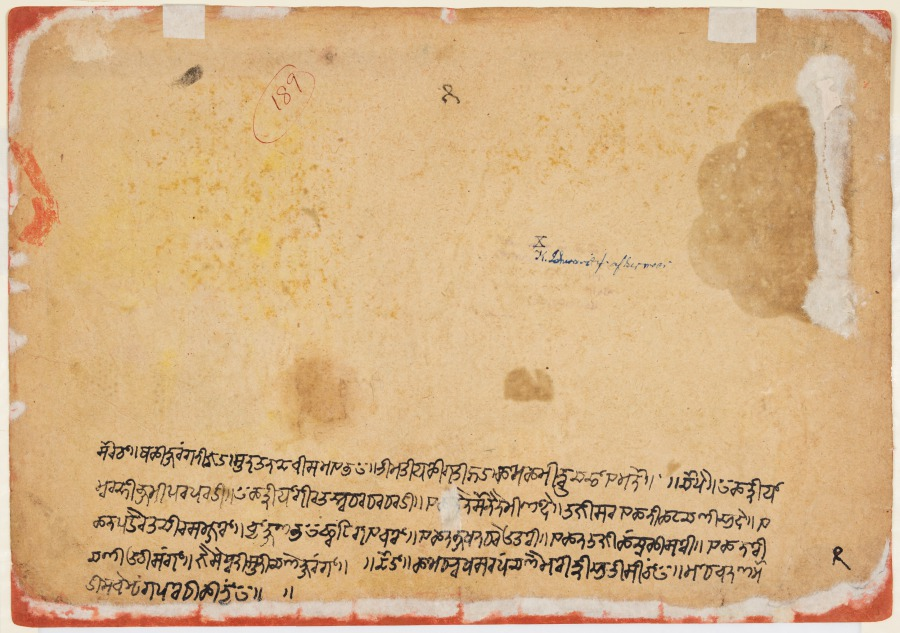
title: A group of women in ecstasy before Madhava, folio 4 from a Madhavanala-Kamakandala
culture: Northern India, Pahari kingdoms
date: c. 1720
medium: gum tempera and gold on paper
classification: Painting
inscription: Takri number: 4; Roman numeral: X-K. Ishwari Singh of Sirmur; number 189. sorathā. thakī jaraṃga nī jahī sunata nāda bisa mādha bhaī. tisatī thakī gahī gayī kāma kamī dhucadhā imano. caupai. ika trīya murachī bhumī para paraī. ika trīya gīrata ardharadhara dharaī. ek nena so nena mīlave. taji sara eka nikata calī āve. ek na paharete cīra sambhārā. vyākala bhaī chutī gaye barā. ekana bhūkhana dhare utārī. ekana taji kancukī sārī. eka nārī calī uthī saṃgā. jaise dhūnī munī cale kuraṃga. doha. kāma dhukha sara paṃca le mārī trīha tī sīṭhaī. mādhavanala mohi save saṃga pāraī kī naī.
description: The raptures of Madhava’s audience intensify. As he plays, the music becomes increasingly climactic. Several women stand immobilized; others make emotive gestures. Some faint, while others feel compelled to remove their clothes and jewelry. Written by a Sufi Muslim poet embracing mysticism, the story shows how devotees should feel toward Allah, god of Islam. In the Hindu courts of Pahari India, however, the story provided entertainment for the educated elite. The women’s ecstasies can also be viewed in the context of the Hindu devotional movement (bhakti), characterized by using poetry and art to stir a sense of erotic love for Krishna or Rama.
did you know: Mesmerized women sitting by the well are removing their jewelry.